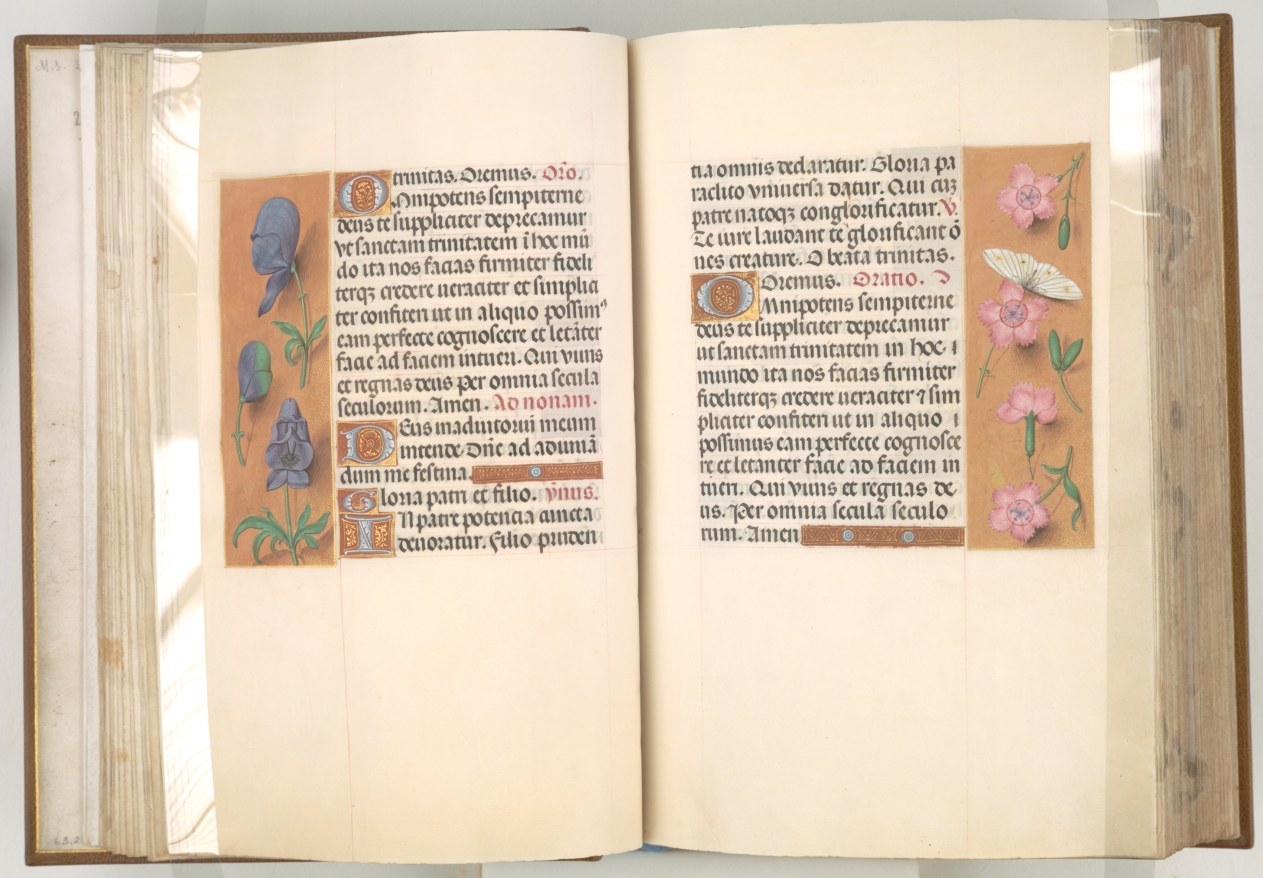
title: Hours of Queen Isabella the Catholic, Queen of Spain: Fol. 21r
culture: Flanders, Ghent and Bruges, late 15th century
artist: Master of the First Prayerbook of Maximillian (Flemish, c. 1444–1519)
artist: and Associates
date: c. 1500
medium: ink, tempera, and gold on vellum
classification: Bound Volume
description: This manuscript was illuminated by a circle of at least five highly organized manuscript painters active in the Flemish cities of Ghent and Bruges. The principal illuminator was Alexander Bening, who painted the majority of the book's miniatures. Manuscripts produced by this circle of artists are renowned for the decoration of their borders, which typically feature a rich variety of realistically-painted flowers, birds, and butterflies. This prayer book, called a book of hours, was intended not for a cleric, but for the private devotions of a lay person-in this case, Isabella the Catholic, Queen of Spain (1451-1504). Isabella's coat of arms embellishes the book's frontispiece. It is unlikely that the book was commissioned by the Queen herself; rather, she probably received it as a diplomatic gift from someone courting her patronage, perhaps Cardinal Francisco Jimenez de Cisneros. A Franciscan friar, Jimenez was dependent upon Isabella for his advancement, first to the post of Queen's confessor in 1492, and then to Archbishop of Toledo in 1495.